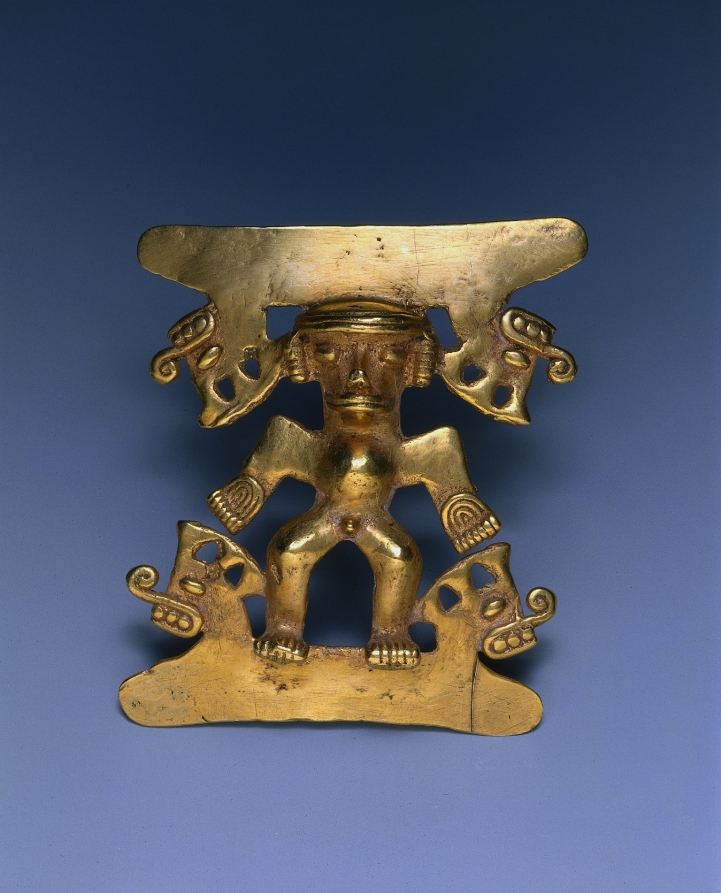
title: Figurine Pendant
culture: Western Panama, Veraguas-Gran Chiriquí Style, 8th-16th Century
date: c. 700–1550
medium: cast and hammered gold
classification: Metalwork